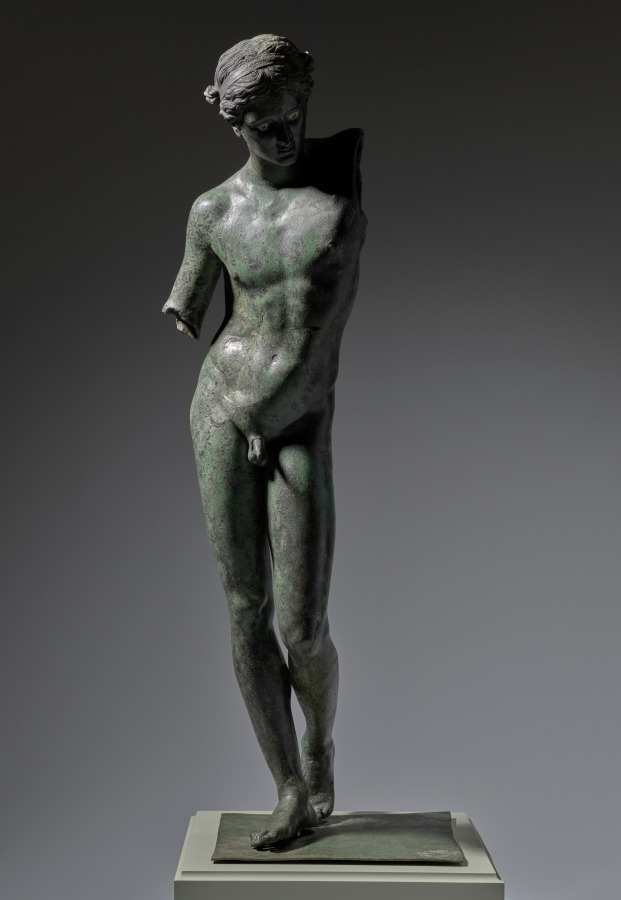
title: The Cleveland Apollo: Apollo Sauroktonos (Lizard-Slayer) or Apollo the Python-Slayer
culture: Greece, Athens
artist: attributed to Praxiteles (Greek, Athenian, c. 400–330 BCE)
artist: or Follower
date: c. 350–200 BCE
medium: bronze, copper, and stone inlay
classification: Sculpture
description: The Cleveland Apollo has been called both Lizard-Slayer (Sauroktonos) and Python-Slayer. The first name comes from the Roman author Pliny the Elder (23–79 CE), who noted in describing bronze works made by the Athenian sculptor Praxiteles (active around 370–330 BCE), “the youthful Apollo [is] known as the Sauroktonos because he is aiming an arrow at a lizard [Greek sauros] which is stealing toward him.” Scholars have long connected this description with artworks showing the young Greek god Apollo in a distinctive pose and hairstyle, standing on his right leg and leaning to his left. In more completely preserved versions, Apollo reaches toward a tree with his left arm and seems to take aim at a lizard. The Cleveland Apollo shows the adolescent god similarly posed and coiffed, making it an important addition to the Apollo Sauroktonos group—the only surviving large-scale bronze sculpture of the type. The young Greek god Apollo, identifiable by his distinctive hairstyle and pose, stands on his right leg and leans to his left, probably toward a now-lost tree. Although now separated, the left forearm and hand survive, together with an unusual lizard-like creature, perhaps drawn from the world of myth. A flat bronze base also remains, though it may be a later adaptation. A tree or other support has been lost, probably smaller than in the marble versions. Given its material and very high artistic quality—note the lifelike hair, fingernails, and inlaid copper lips and nipples—more than one scholar has suggested that the Cleveland Apollo could be the very sculpture seen by Pliny. Some have called the sculpture “Python-Slayer,” seeing the oddly shaped serpentine creature with asymmetrical legs as the mythical Python killed by Apollo in establishing his sanctuary at Delphi. But technical details may explain some of the asymmetry, and no other specific evidence connects it to Delphi. Most scholars would retain the name Sauroktonos (Lizard-Slayer) for the Cleveland Apollo, even as some debate whether it was made by Praxiteles himself or a later follower.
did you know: The Cleveland Apollo is the only surviving large-scale bronze sculpture of its type, Apollo Sauroktonos (the Lizard-Slayer).